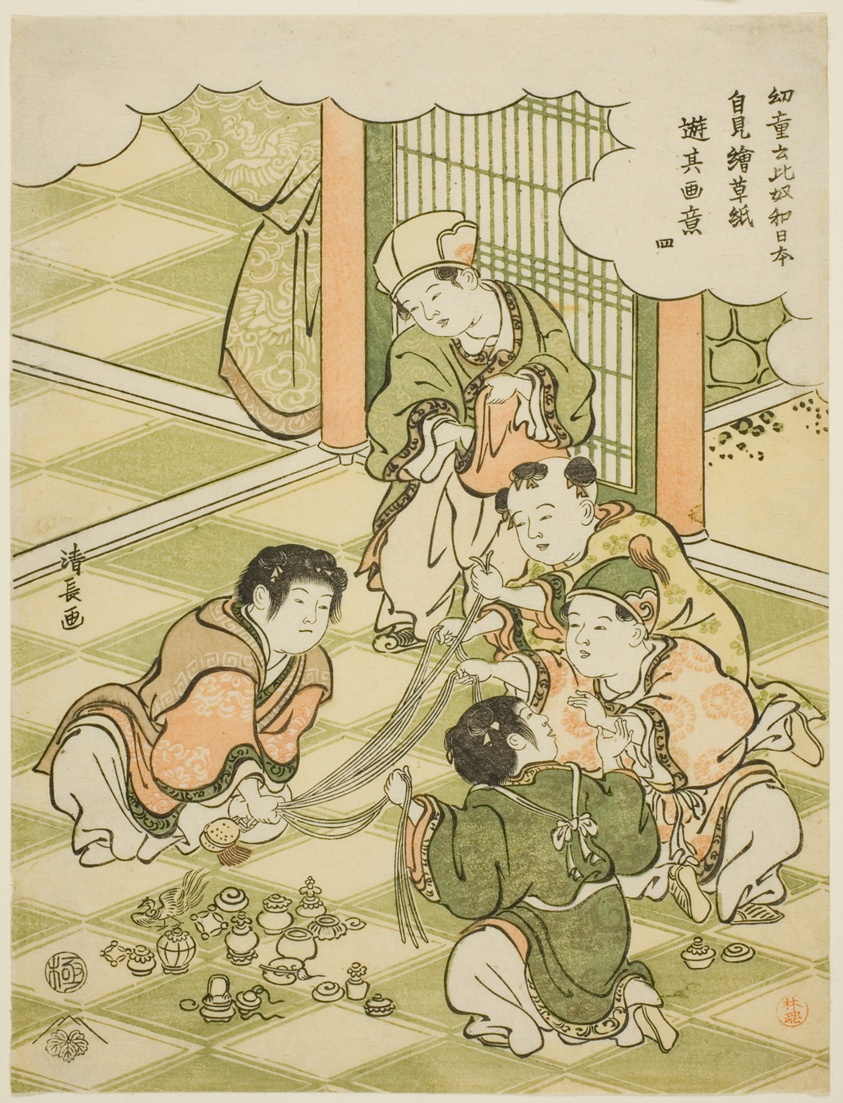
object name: Print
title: No. 4: Chinese boys playing a raffle game, from the series "Children Say 'This is Japan!' and Imitate the Games They See in Picturebooks (Yodo iu koitsu wa Nippon, ezoshi o mite yori sono gai ni asobu)"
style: Japanese (culture or style)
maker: Torii Kiyonaga (Japanese, 1752-1815)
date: c. 1791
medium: Color woodblock print; chuban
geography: Japan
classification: woodblock print; print; asian art